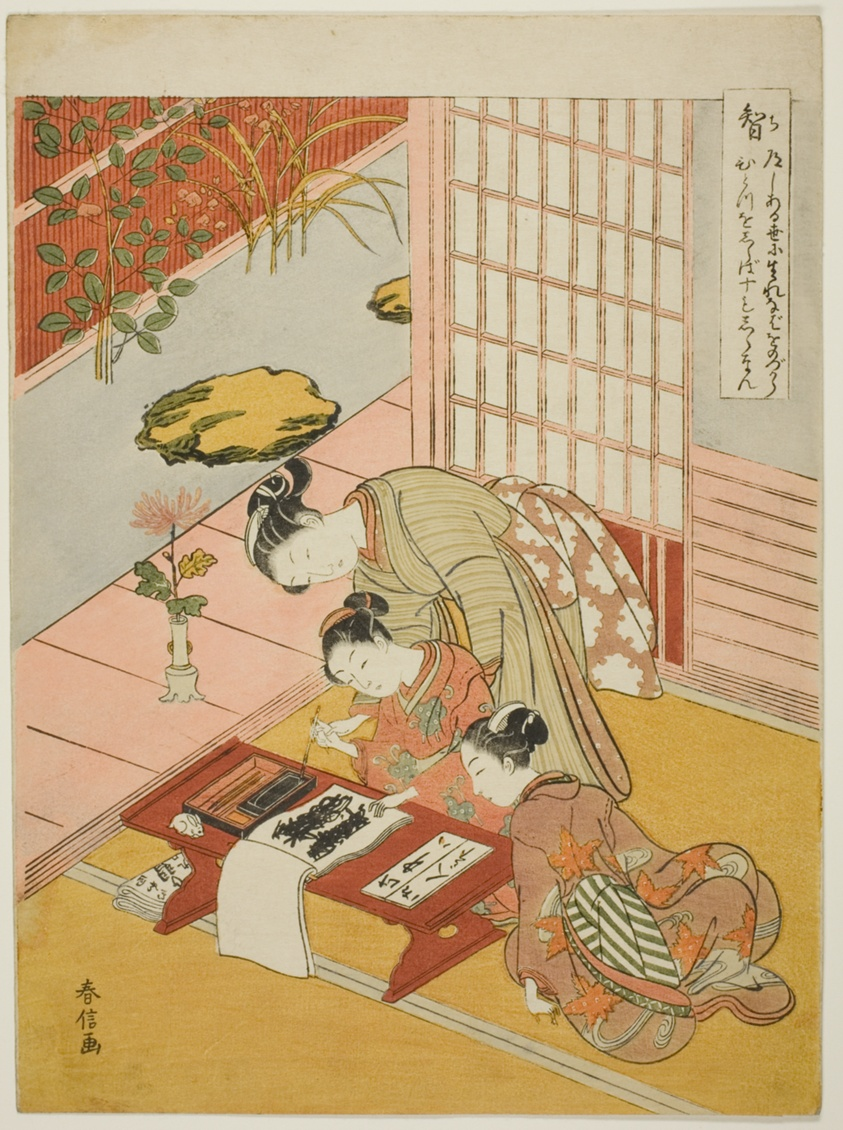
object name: Print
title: Knowledge (Chi), from the series "Five Cardinal Virtues"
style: Japanese (culture or style)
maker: Suzuki Harunobu 鈴木 春信; Japanese, 1725 (?)-1770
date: 1767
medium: Color woodblock print; chuban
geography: Japan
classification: woodblock print; print; asian art